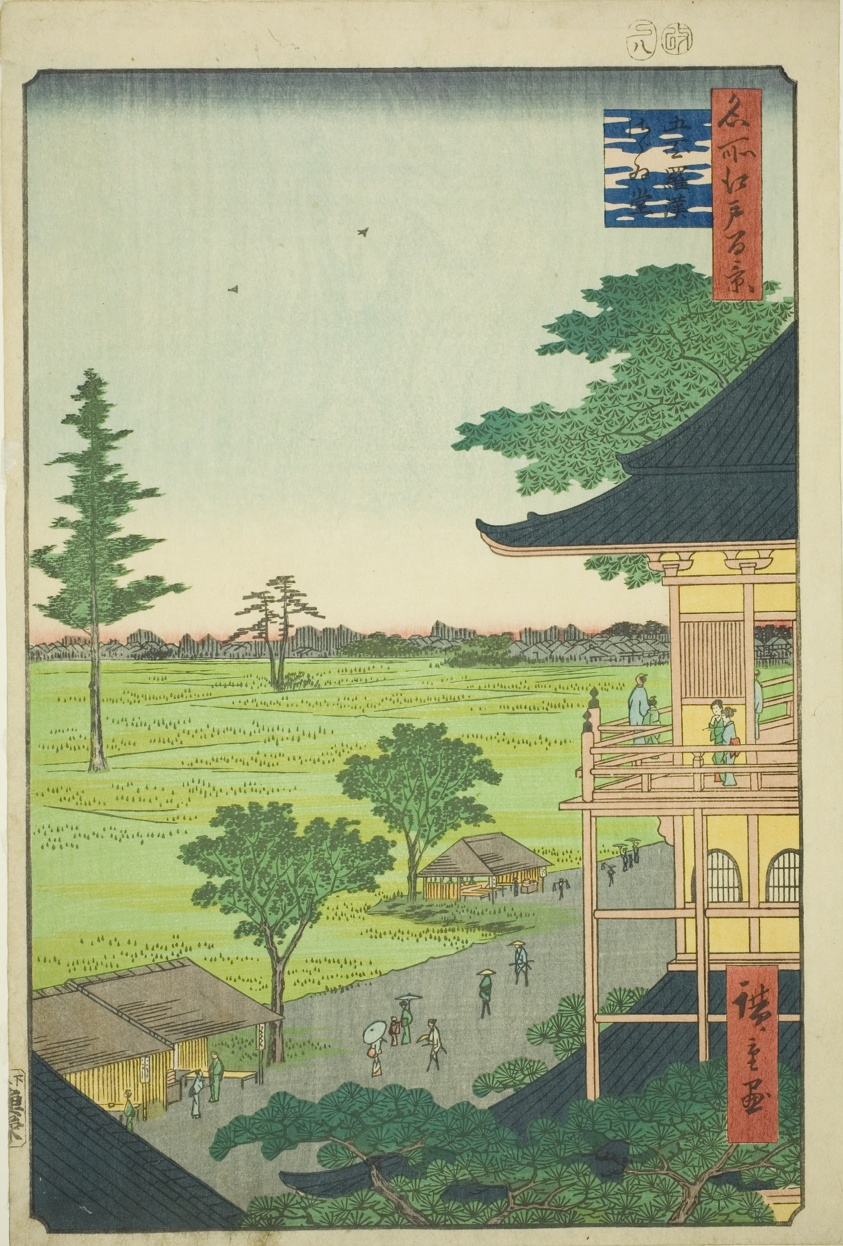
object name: Print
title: Sazai Hall of the Five Hundred Rakan Temple (Gohyaku Rakan Sazaido), from the series “One Hundred Famous Views of Edo (Meisho Edo hyakkei)”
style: Japanese (culture or style)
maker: Utagawa Hiroshige 歌川 広重; Japanese, 1797-1858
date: 1857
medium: Color woodblock print; oban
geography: Japan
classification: woodblock print; print; asian art